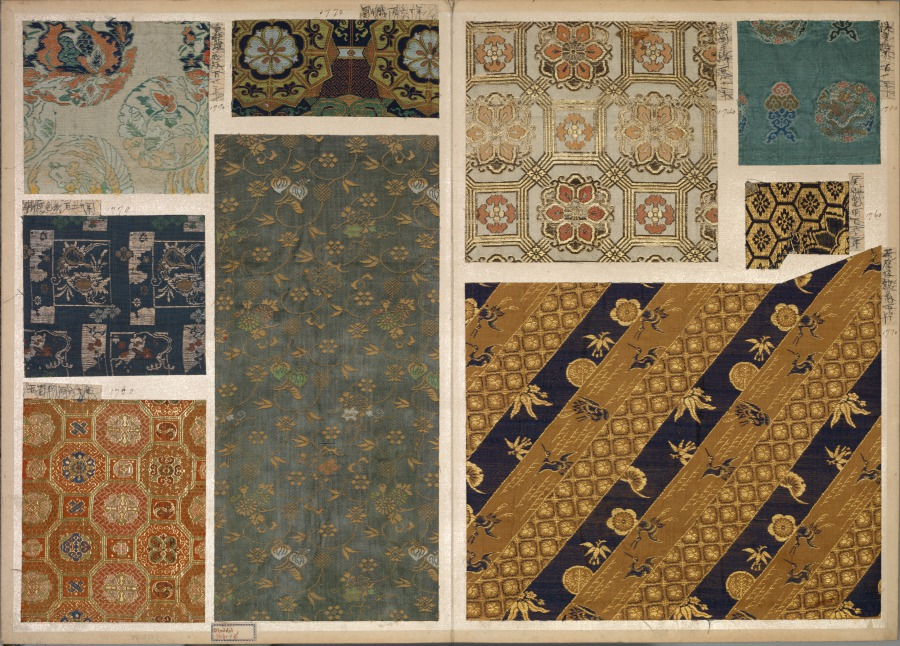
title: Album of Textile Samples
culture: Japan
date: 1790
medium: silk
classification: Textile